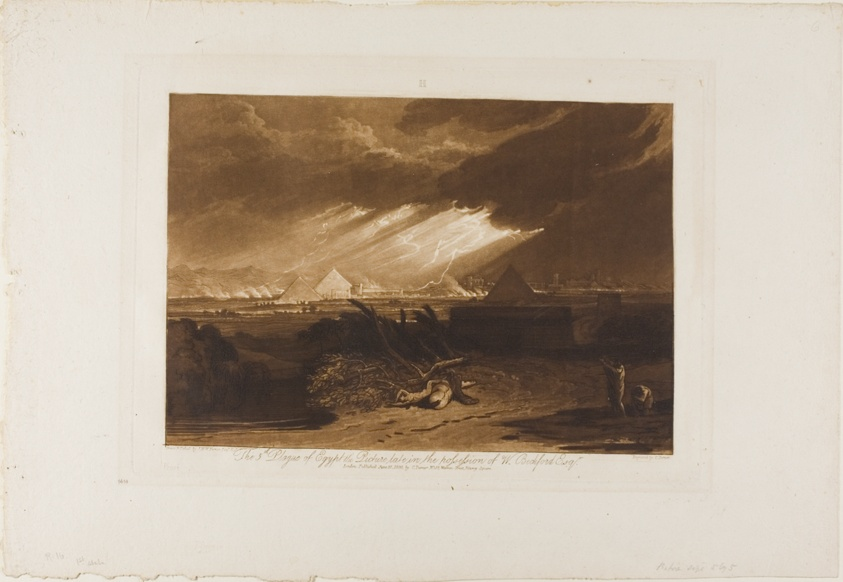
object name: Print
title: The Fifth Plague of Egypt, plate 16 from Liber Studiorum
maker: Joseph Mallord William Turner (English, 1775-1851); Engraved by Charles Turner (English, 1773-1857)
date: published June 10, 1808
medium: Mezzotint and etching in brown on ivory wove paper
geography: England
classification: etching; print; prints and drawing